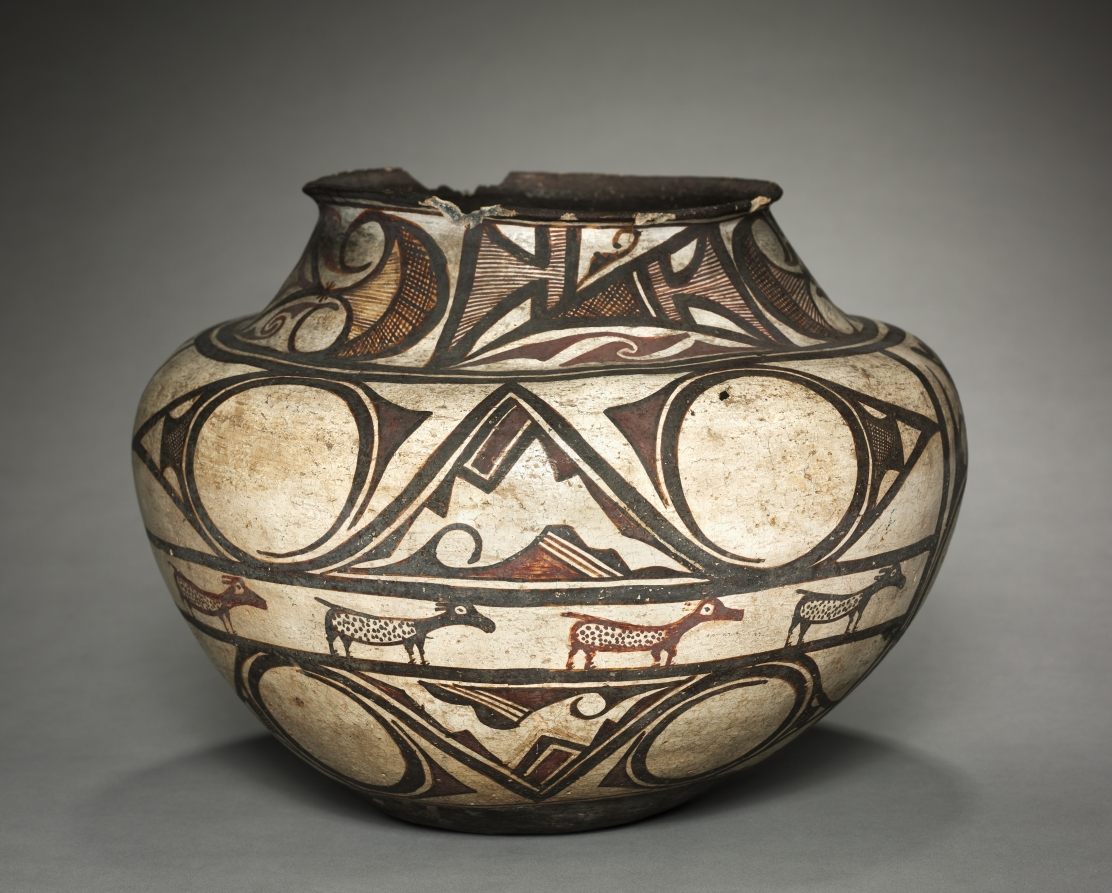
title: Water Jar (Olla)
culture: Southwest,Pueblo, Zuni, Post-Contact Period, late 19th century - early 20th century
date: 1880–1900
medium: ceramic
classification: Ceramic